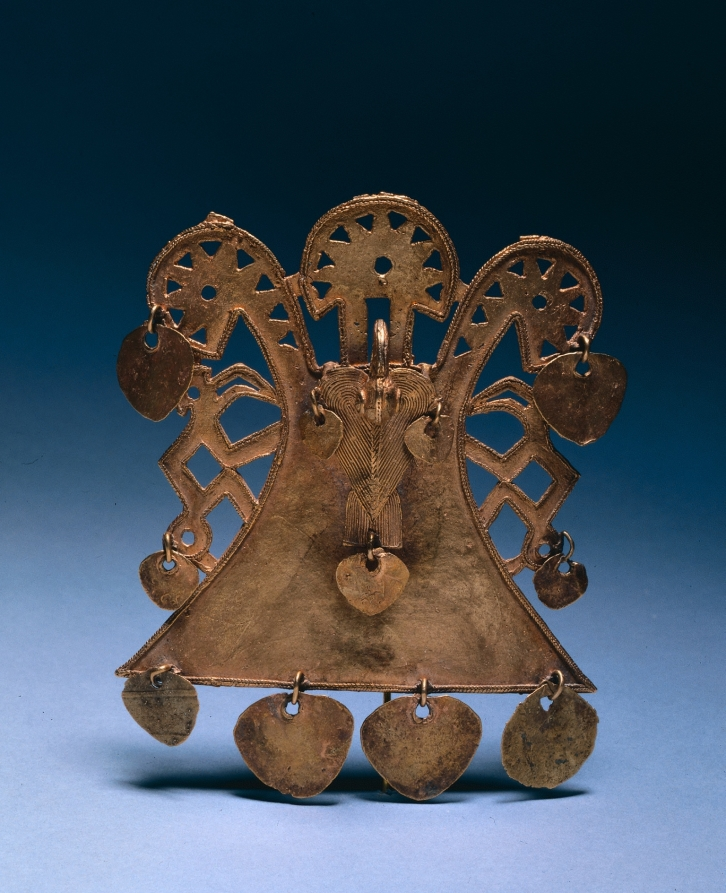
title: Bird Pendant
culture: Colombia, Muisca style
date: c. 900–1550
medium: cast gold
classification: Metalwork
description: This elaborate bird pendant was worn. It features delicate herringbone moldings, open-work patterns, and wing details-all part of the wax model from which the pendant was cast using the lost-wax process. The dangles were attached after casting.